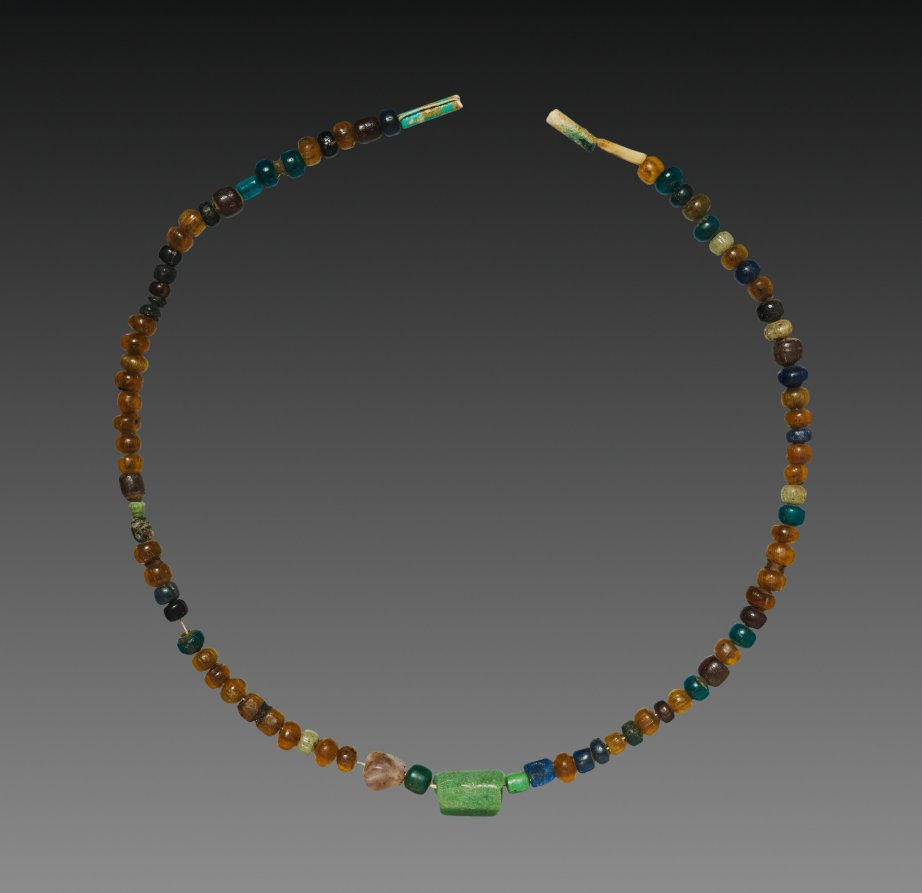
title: Necklace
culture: Egypt, Greco-Roman period (332 BCE–395 CE), Roman empire (30 BCE–395 CE)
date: 30 BCE–395 CE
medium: various materials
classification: Jewelry